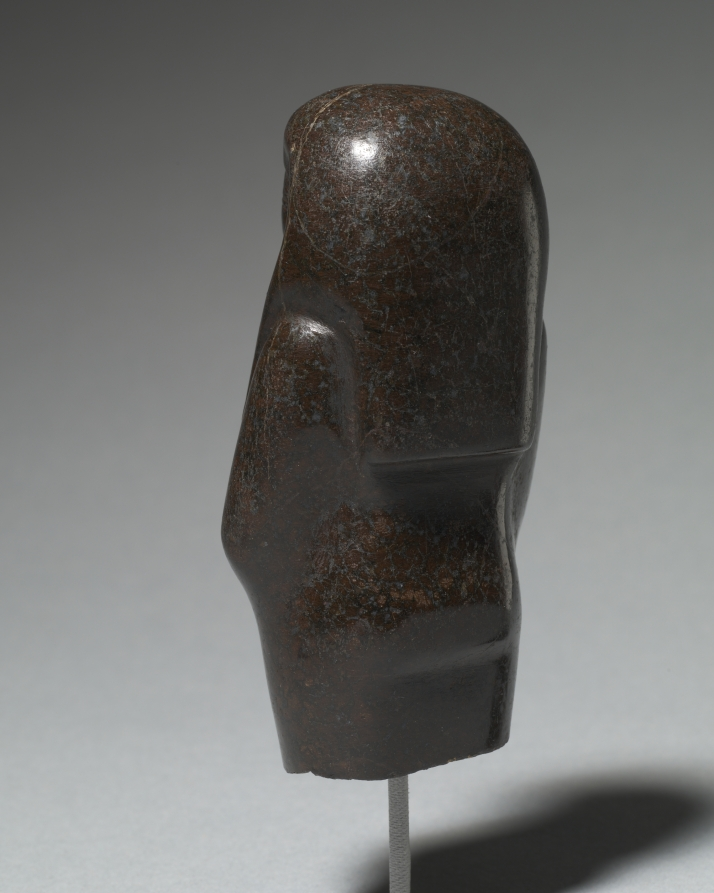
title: Shawabty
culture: Egypt, Middle Kingdom (2040–1648 BCE), Dynasties 12–13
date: c. 1859–1648 BCE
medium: hematite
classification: Funerary Equipment